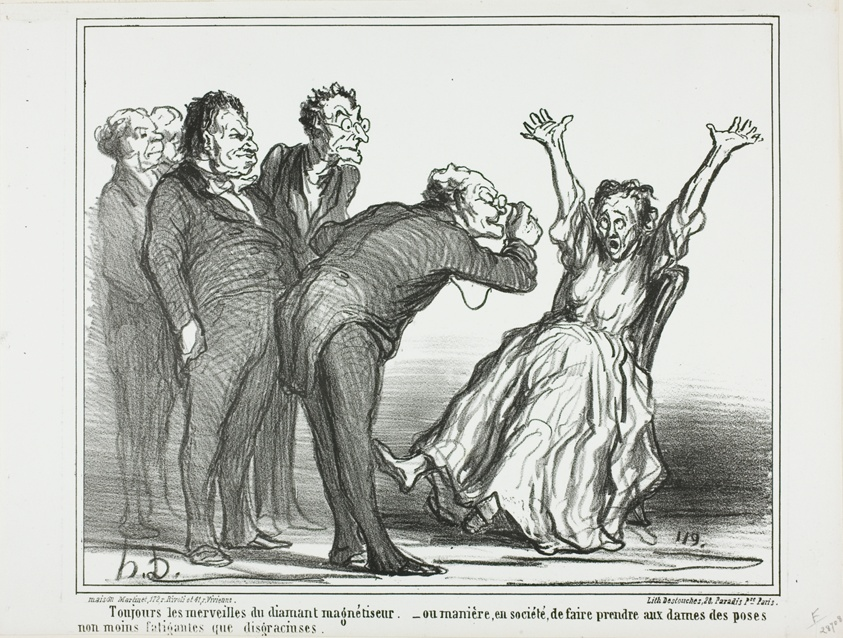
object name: Print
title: More marvels from the diamond hypnotist. Or, how to make the ladies pose in society in exhausting and not very gracious positions, plate 137 from Actualités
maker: Honoré Victorin Daumier; French, 1808-1879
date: 1860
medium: Lithograph in black on white wove paper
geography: France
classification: lithograph; print; prints and drawing